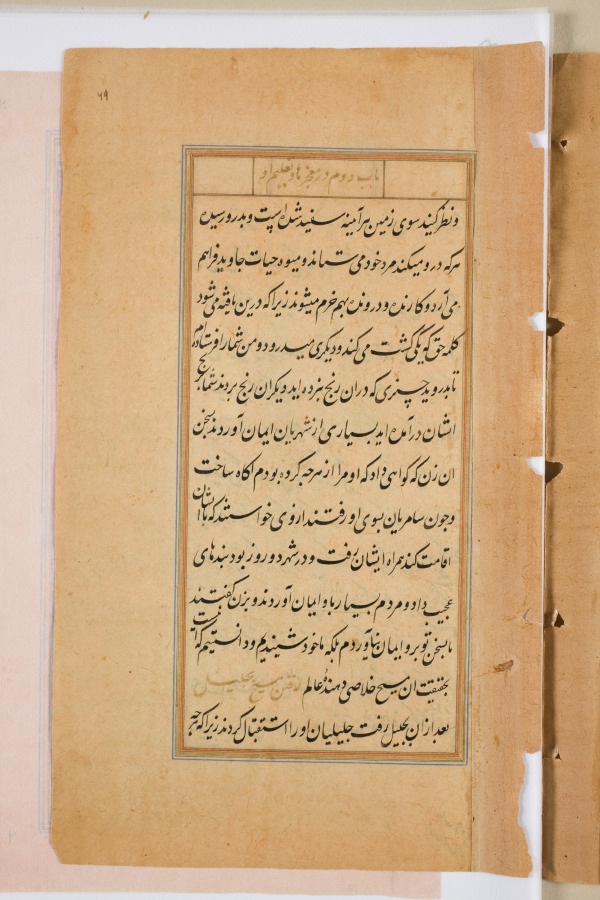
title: Text page from a Mirror of Holiness (Mir’at al-quds) of Father Jerome Xavier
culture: Mughal India, Allahabad, made for Prince Salim (1569–1627)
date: 1602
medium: Ink and gold on paper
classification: Manuscript